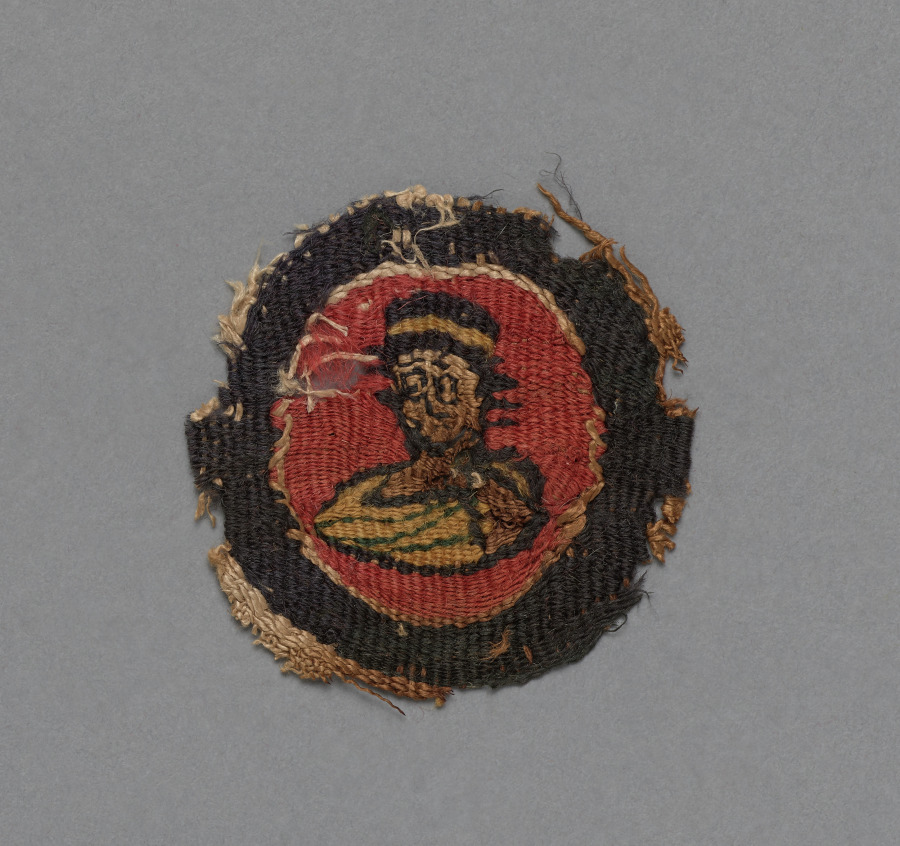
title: Fragment from a Tunic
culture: Egypt, 6th - 16th century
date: 500s - 1500s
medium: tabby weave with inwoven tapestry ornament, linen and wool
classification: Textile